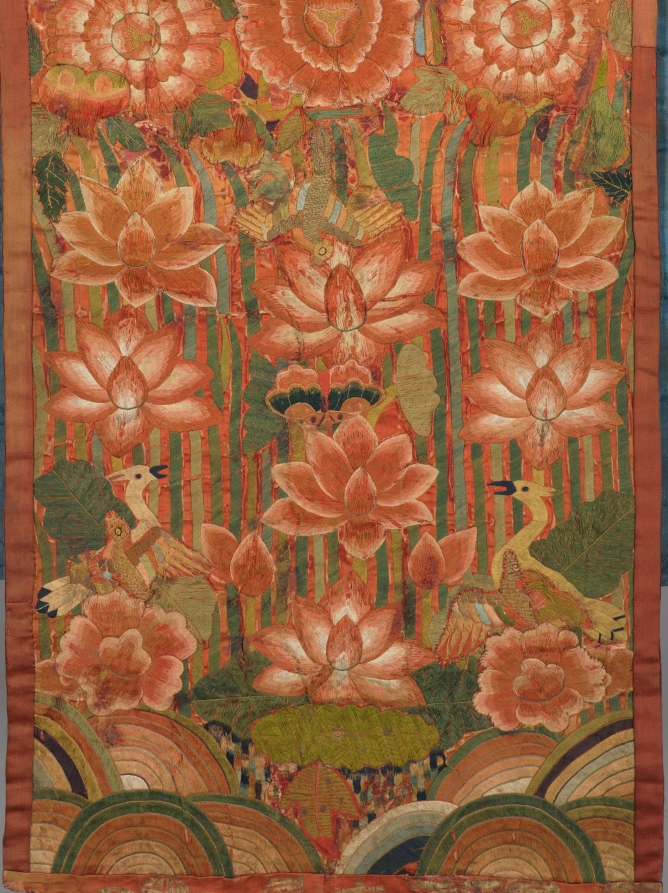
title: Bridal Robe (Hwarot)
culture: Korea, Joseon dynasty (1392–1910)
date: 1850–1910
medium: Satin weave silk; silk embroidery; paper edging on neck and sleeves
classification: Garment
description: This bride's robe is exquisitely embroidered with various symbols of happiness in colorful silk threads. Butterflies stand for marital happiness; the phoenix, numerous offspring; and lotus flowers and white cranes, longevity. Yet, the bridal robe does not attest to the life of luxury. To the contrary, many traces of repairs, trimmings, and patchwork reflect Joseon period women’s commitment to value neo-Confucian aesthetics of frugality and modesty. Substantial repairs and patching reveal that this robe served as an important communal resource to be shared and passed down through several generations. Its collar and sleeves are covered in thick white paper; this paper is replaced with new paper for each bride, while the robe itself was reused for decades.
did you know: This bride's robe was not made for one specific bride, but rather was shared and passed down to many brides.